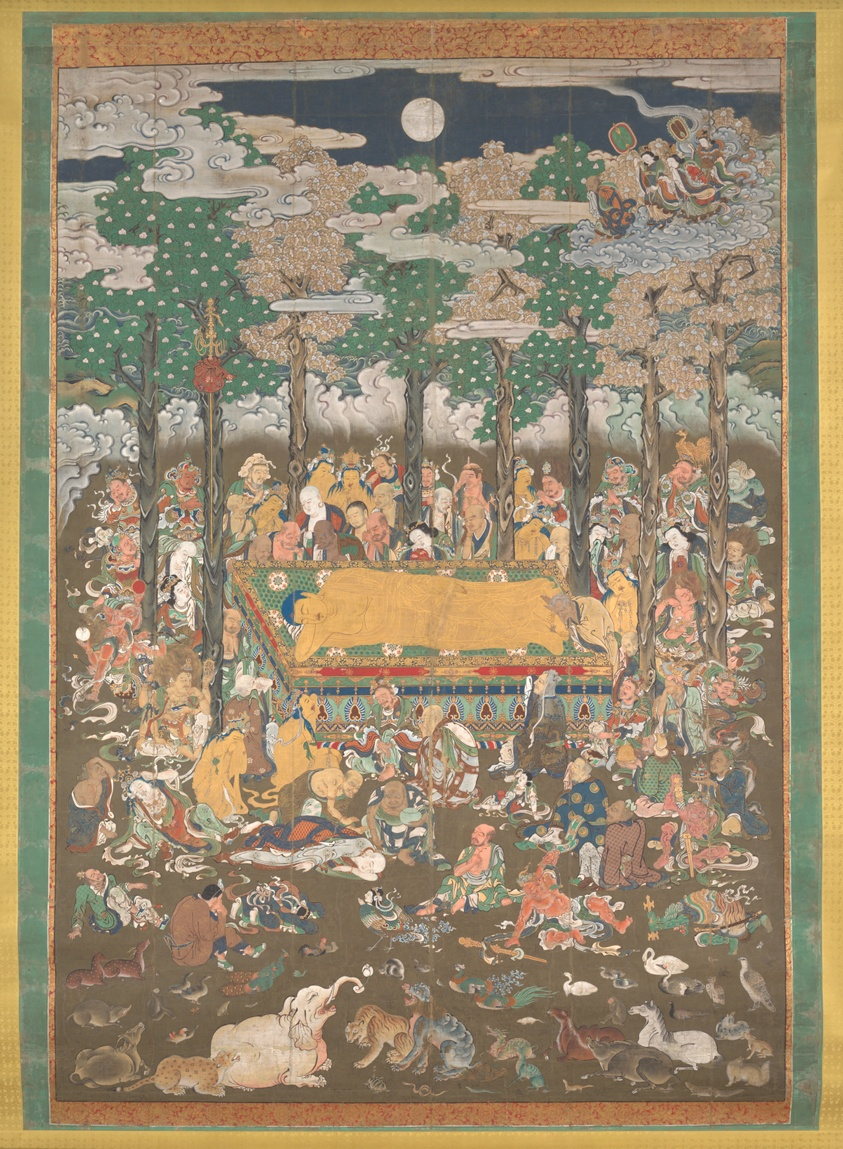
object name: Painting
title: Nehan: Death of the Buddha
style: Japanese (culture or style)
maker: Artist unknown; Japanese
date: late 17th/early 18th century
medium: Hanging scroll; ink, colors, and gold on silk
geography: Japan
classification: hanging scroll; painting; asian art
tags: Buddhism, religion